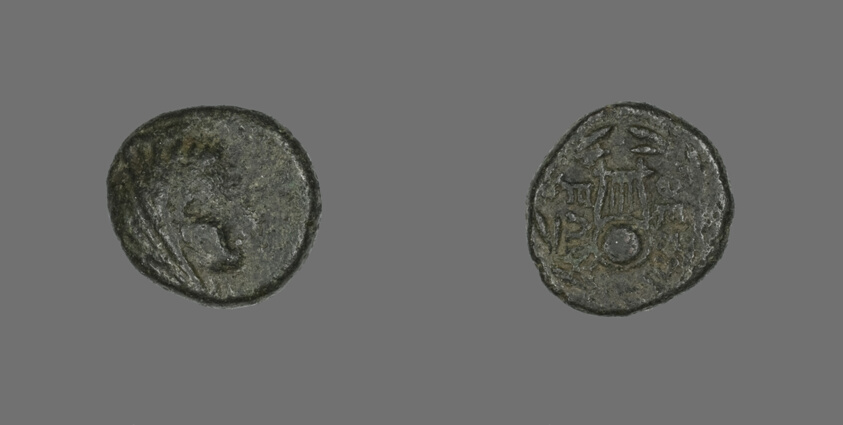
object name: Coin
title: Hemidrachm (Coin) Depicting a Female Head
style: greek, ancient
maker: Greek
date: 146-27 BCE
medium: Silver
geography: Greece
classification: coin; ancient art